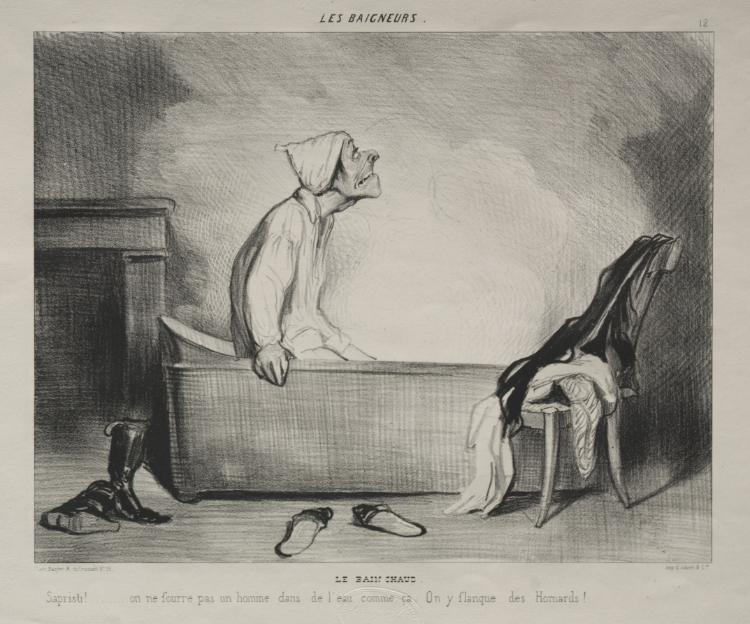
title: The Hot Bath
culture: France, 19th century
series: The Bathers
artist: Honoré Daumier (French, 1808–1879)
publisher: Aubert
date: 1839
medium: lithograph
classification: Print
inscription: Upper margin, pencil: 639 ; lower margin, printed: Chez Bauger R. du Croissant No. 16 / Imp. d'Aubert & Cie. ; Verso, pencil: TR 1080/8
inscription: Above image, printed: LES BAIGNEURS, / 12 ; Below image, printed: LE BAIN CHAUD. / Sapristi!.......... on ne fourre pas un homme dans l'eau come ça, On y flanque des Homards!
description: This print was published as plate 12 from the series The Bathers.